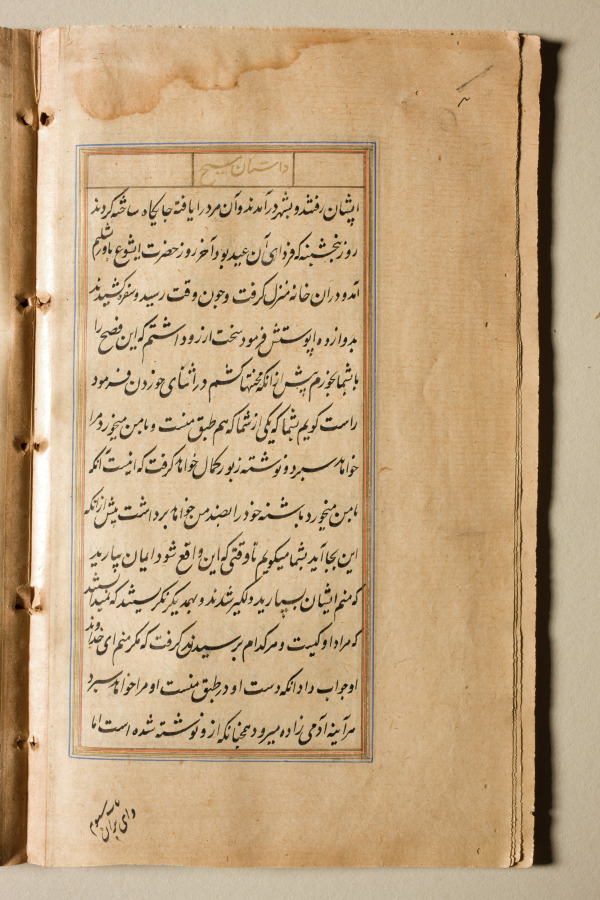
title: Text page from a Mirror of Holiness (Mir’at al-quds) of Father Jerome Xavier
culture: Mughal India, Allahabad, made for Prince Salim (1569–1627)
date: 1602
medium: Ink and gold on paper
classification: Manuscript